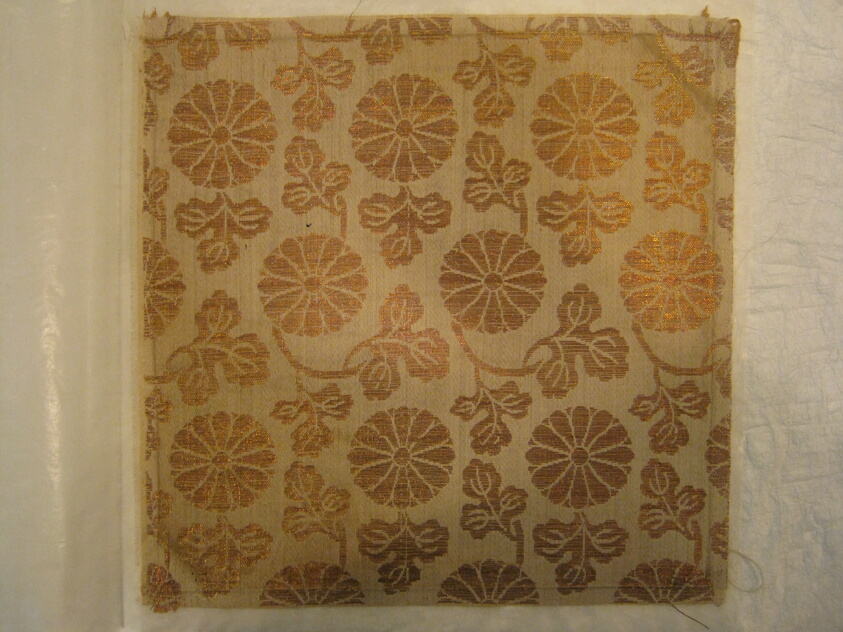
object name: Textile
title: Fragment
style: late edo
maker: Japan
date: late Edo period (1789–1868)/ Meiji period (1868–1912), 1850/1900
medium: plain compound twill, silk and gilt paper; 2 1/2 strips to m.m.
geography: Japan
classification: textile; weaving